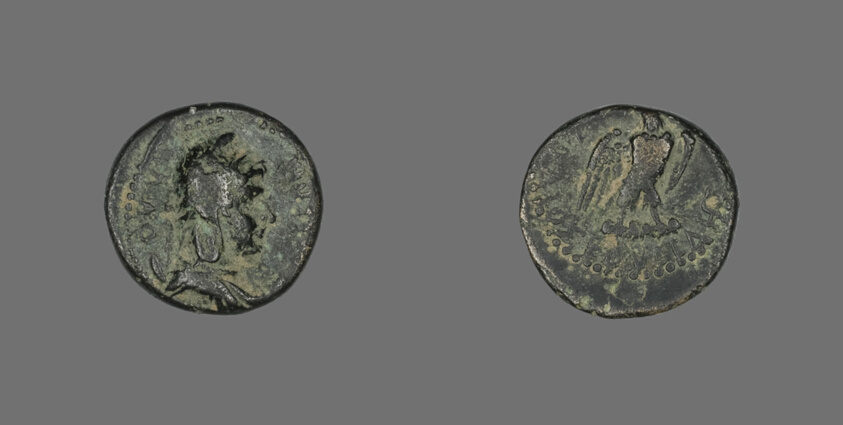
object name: Coin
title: Coin Depicting the Head of a Man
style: ancient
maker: Greek or Roman; Laodicea, Phrygia (now Turkey)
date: 27 BCE-14 CE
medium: Bronze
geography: Ancient Greece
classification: coin; ancient art